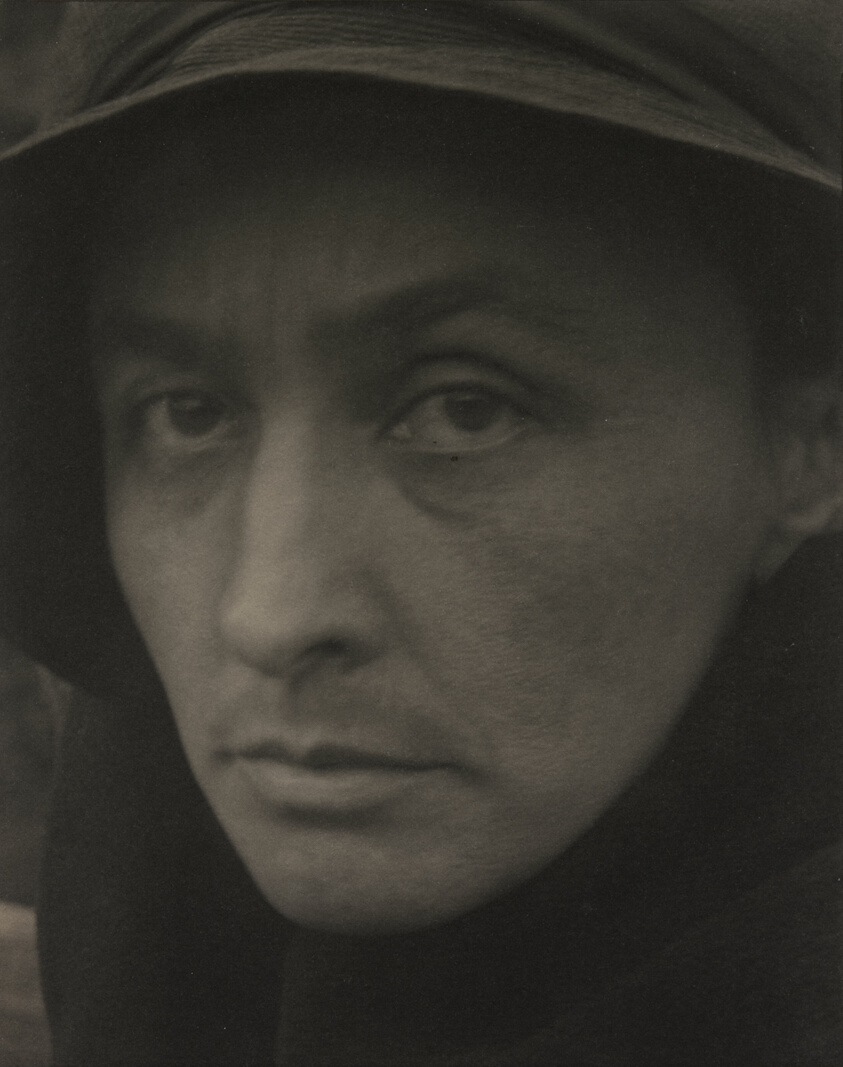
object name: Photograph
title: Georgia O'Keeffe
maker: Alfred Stieglitz (American, 1864–1946)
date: 1922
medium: Palladium print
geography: United States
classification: palladium print; photographic process; photography; photograph